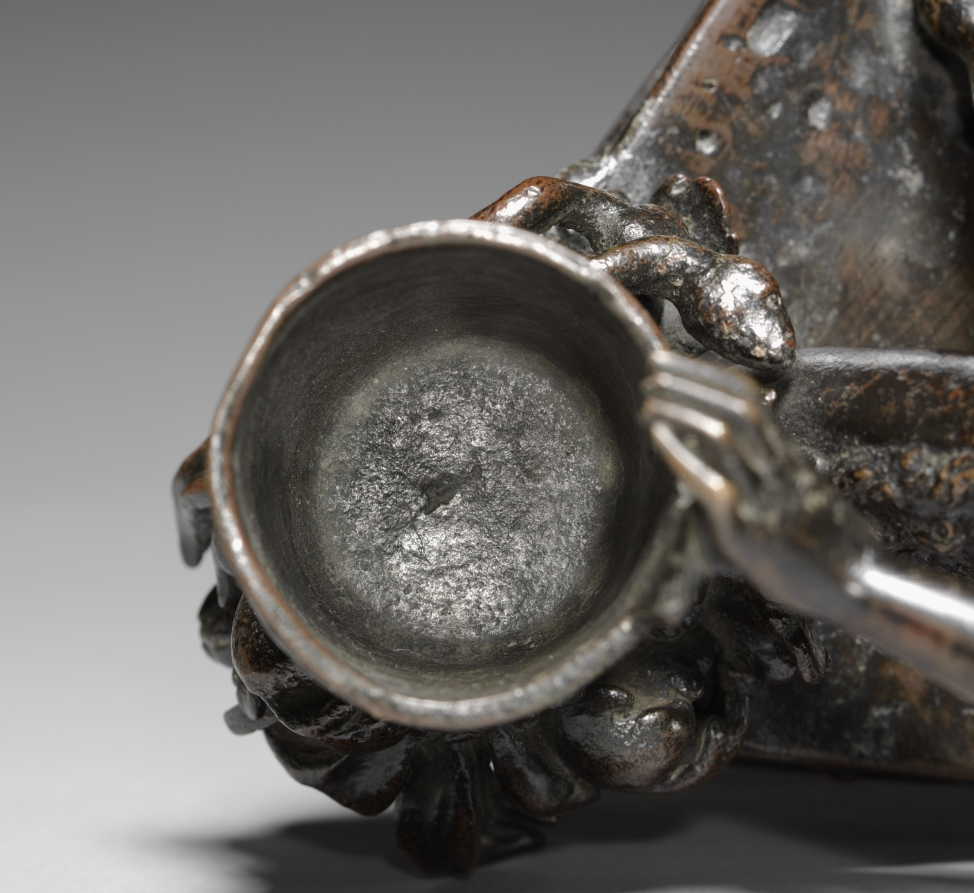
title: Kneeling Satyr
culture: Italy, Ravenna, 16th century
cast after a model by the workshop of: Severo da Ravenna (Italian, c.1496–c.1543)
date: c. 1520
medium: bronze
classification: Sculpture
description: Greek and Roman art and literature typically used satyrs as a form of grotesque comic relief, but Renaissance artists adopted them as jovial celebratory figures of nature and revelry.